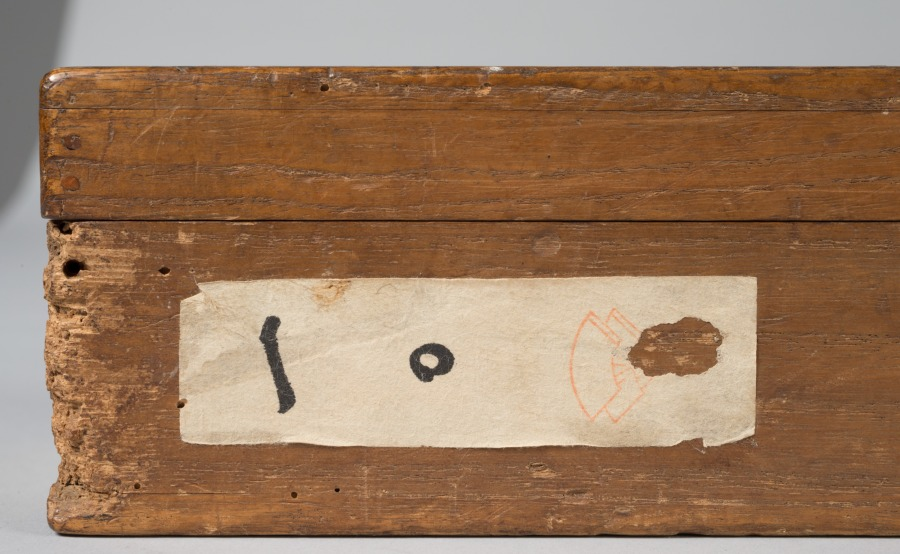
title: Emperor Minghuang Teaching Yang Gueifei to Play the Flute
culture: Japan, Muromachi period (1392–1573)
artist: Choryusai (Japanese)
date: late 1400s–early 1500s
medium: hanging scroll; ink and color on paper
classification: Painting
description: Minghuang, a prominent emperor of Tang (618-906) China and his consort, Yang Gueifei, have inspired many legends, paintings, and poetry in later Chinese culture. Through the study of Chinese literature and the collecting of Chinese paintings, tales of their lives and romance became well-known in Muromachi Japan.